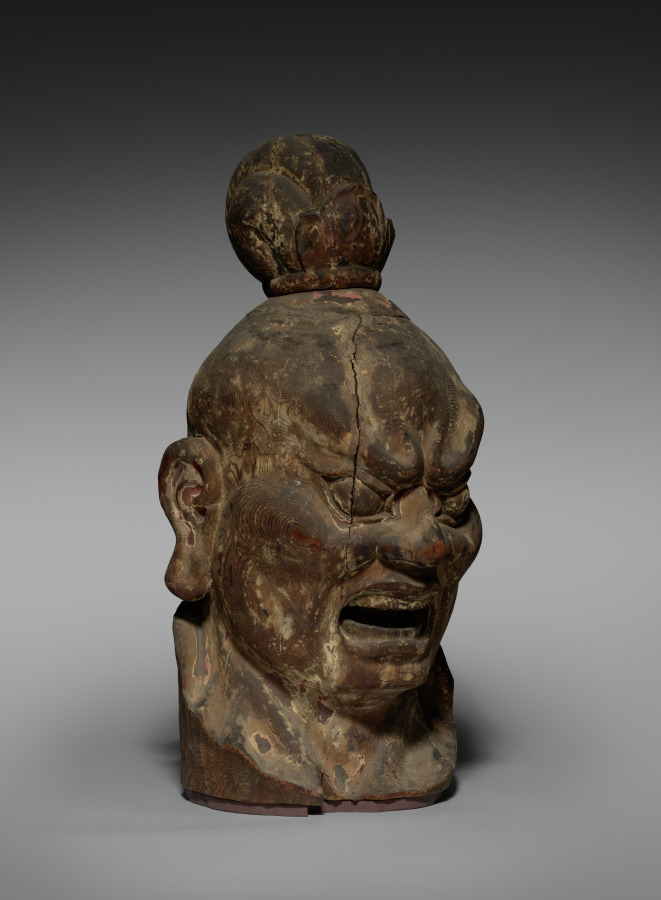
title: Head of Ni-o with Open Mouth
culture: Japan, Kamakura period (1185–1333)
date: 1200s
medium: wood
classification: Sculpture